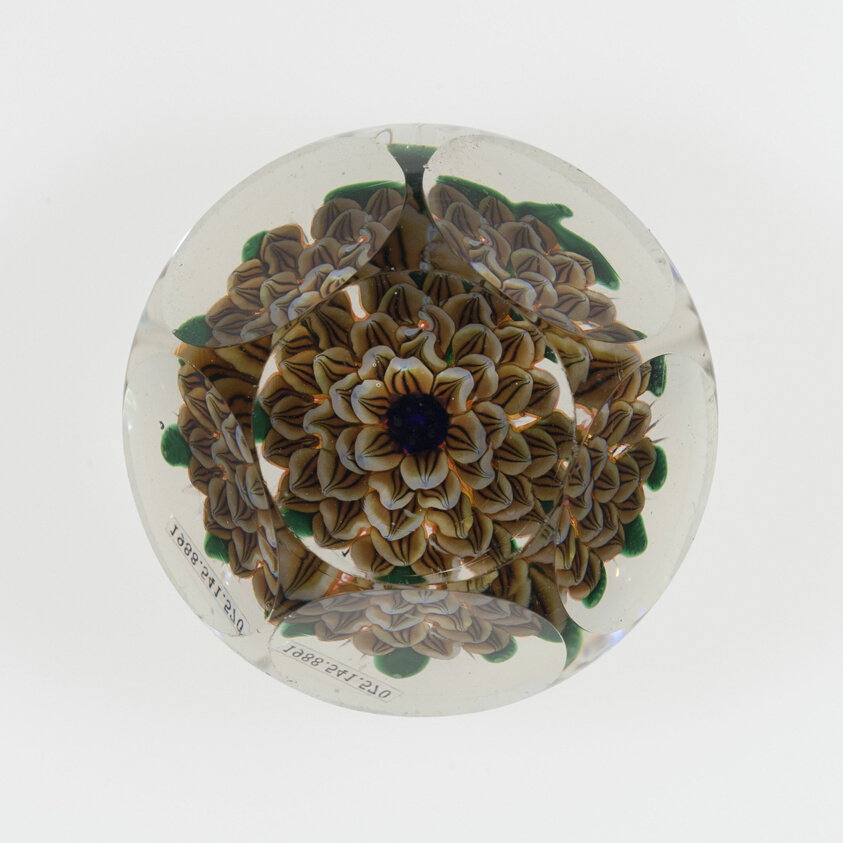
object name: Glass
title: Paperweight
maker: Saint-Louis Glassworks (Cristalleries de Saint-Louis); Lorraine, France, founded 1586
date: c. 1845–60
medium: Glass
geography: Saint-Louis-lès-Bitche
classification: paperweight; glass